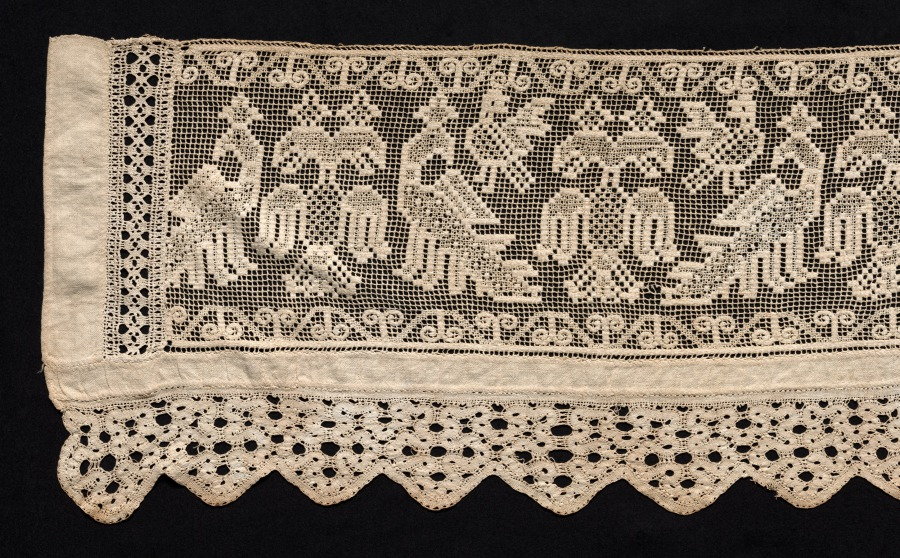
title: Border with Crowned and Double-Headed Birds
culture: Russia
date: 1700s–1800s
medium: Needle lace, filet/lacis (knotted ground and darned in one direction) and bobbin lace (tape lace) edging; bleached linen (est.)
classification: Lace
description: This long border may have functioned as a valance, a decorative drapery made for attachment at the frame of the bed. Crowned double-headed eagles confront peacocks, while smaller birds fly above them.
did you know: Handmade lace for marriage dowries was produced in large quantities in Russia during the eighteenth and nineteenth centuries.